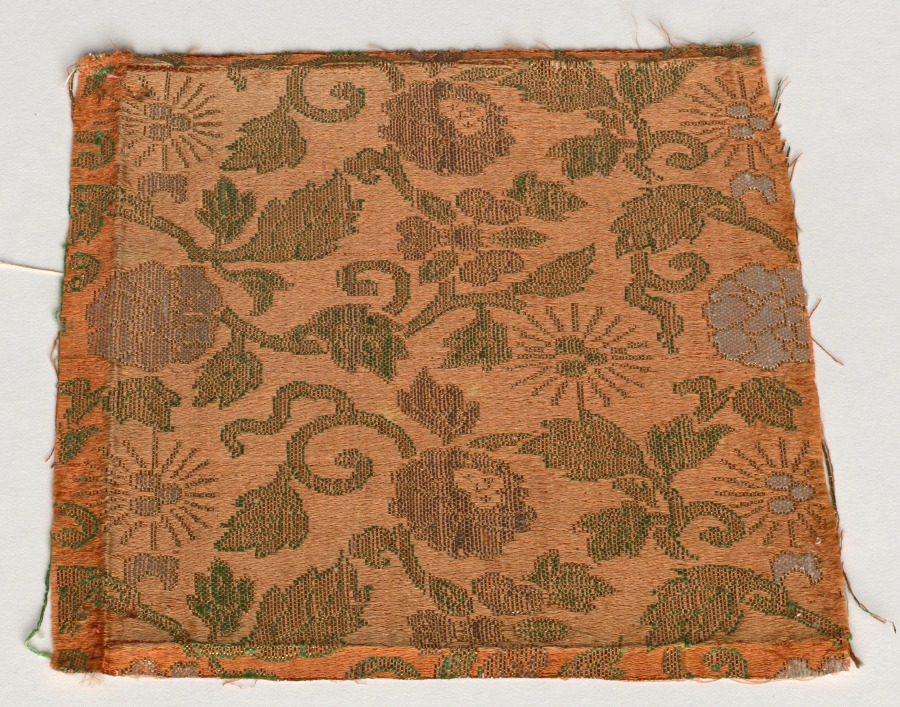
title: Textile Fragment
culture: Japan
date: 1800s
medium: silk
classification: Textile